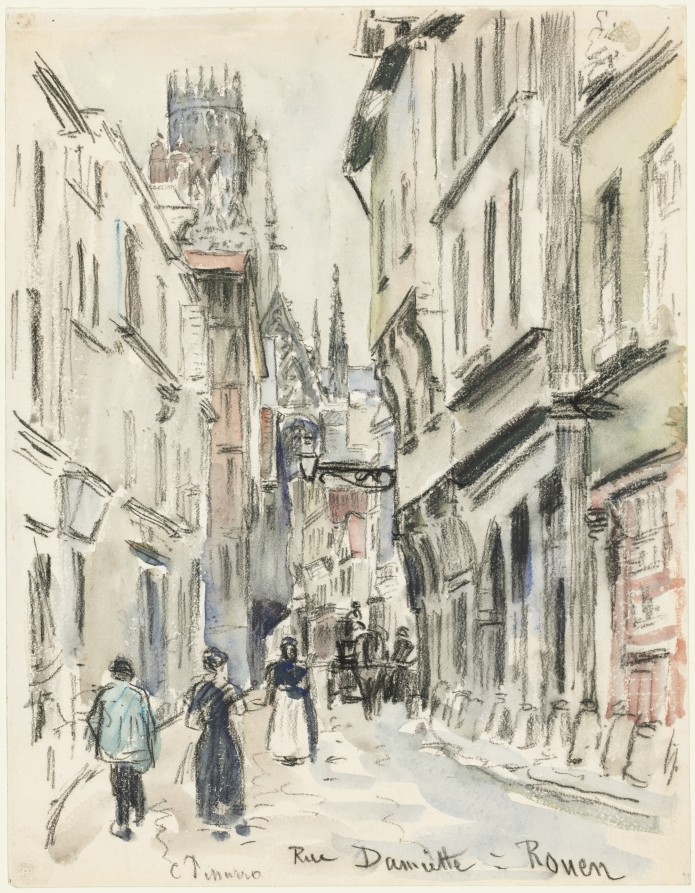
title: Rue Damiette, Rouen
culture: France, 19th century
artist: Camille Pissarro (French, 1830–1903)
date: c. 1884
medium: black chalk and watercolor on wove paper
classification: Drawing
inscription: signed, across bottom, in black crayon: C Pissarro Rue Daumiette à Rouen; watermark: JWhatman / Turkeyhill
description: This drawing was created during an early trip of many that Camille Pissarro took to Rouen, a port city in northern France. It inspired the artist to create a virtually identical etching around the same time, and may have served as a preparatory sketch for that work. A founding member of the Impressionist group, Pissarro spent much of his career painting the rural and landscape outdoors and paid particular attention to the effects of weather and natural light. Here, the gray skies over the town echo the muted tone of the stone buildings that occupy a quiet side street.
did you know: Because of its picturesque qualities, Rouen's rue Damiette has served as a subject for numerous artists.